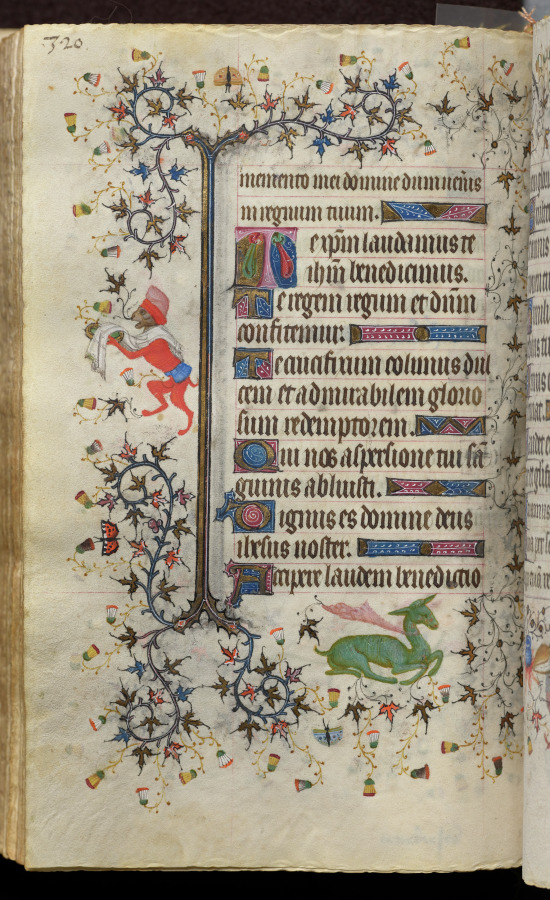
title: Hours of Charles the Noble, King of Navarre (1361-1425): fol. 160v, Text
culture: France, Paris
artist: Master of the Brussels Initials and Associates (French)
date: c. 1405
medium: ink, tempera, and gold on vellum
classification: Bound Volume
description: This precious volume was obviously highly prized by its owner, the French-born King of Navarre, who had his coat of arms painted on no less than twenty folios. Rather than directly commissioning this manuscript from a specific workshop, it seems that Charles the Noble acquired his book of hours -- perhaps ready-made for the luxury market -- while on a trip to Paris in 1404-05. A collaborative effort, six painting styles are evidenced within the pages of this codex, those of two Italians, two Frenchmen, and two Netherlanders. The painter who was responsible for the planning and decoration of the book, and who produced seventeen of the large miniatures, was a Bolognese artist known as the Master of the Brussels Initials. His principal assistant, responsible for most of the borders, was a Florentine who signed his name "Zecho" da Firenze on folio 208 verso.